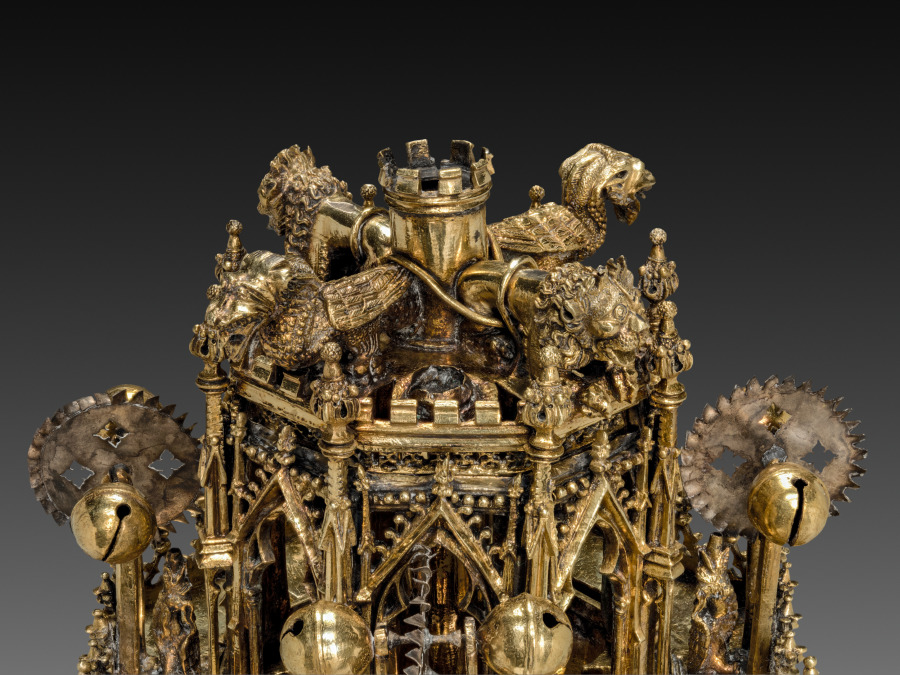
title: Table Fountain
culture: France, Paris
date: c. 1320–40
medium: gilt-silver and translucent enamels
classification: Metalwork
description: Conceptually and stylistically, this object is beyond all else a piece of Gothic architecture in miniature with vaults, pinnacles, columns, and traceried arches. Though the artist who created it is unknown, he was unquestionably inspired by the great Gothic buildings of his time. The table fountain is a three-tiered assembly combining cast elements with bent sheets of gilt-silver. To these have been attached a series of enamel plaques representing grotesque figures, some of which play musical instruments. Water wheels and bells were added to capture motion and sound. The rich detail, precious materials, and involved ornamentation of this deluxe object suggest it would have been expensive to produce and highly treasured by its original owner, someone of high status, and would have been deployed as an object of spectacle. This is the most complete example of its type known to survive from the Middle Ages. Medieval inventories reveal that small fountains like this, often taking various forms, and generally made from precious metals, once existed in large numbers, thus making the Cleveland table fountain an extremely rare object.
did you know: This fountain with its minute architectural details and finely made enamel plaques displayed the wealth and refinement of the owner as it entertained his guests. Imagine hearing the ringing of the tiny bells when this fountain was in use.